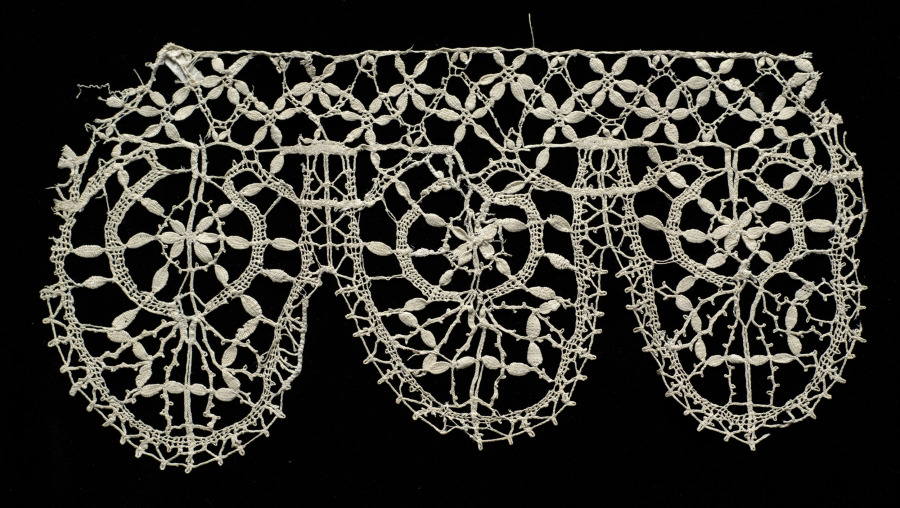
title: Lace Insertion and Edging of Round Points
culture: Italy, Genoa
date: 1600s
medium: Bobbin lace (needle lace, reticella or punto in aria design)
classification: Lace